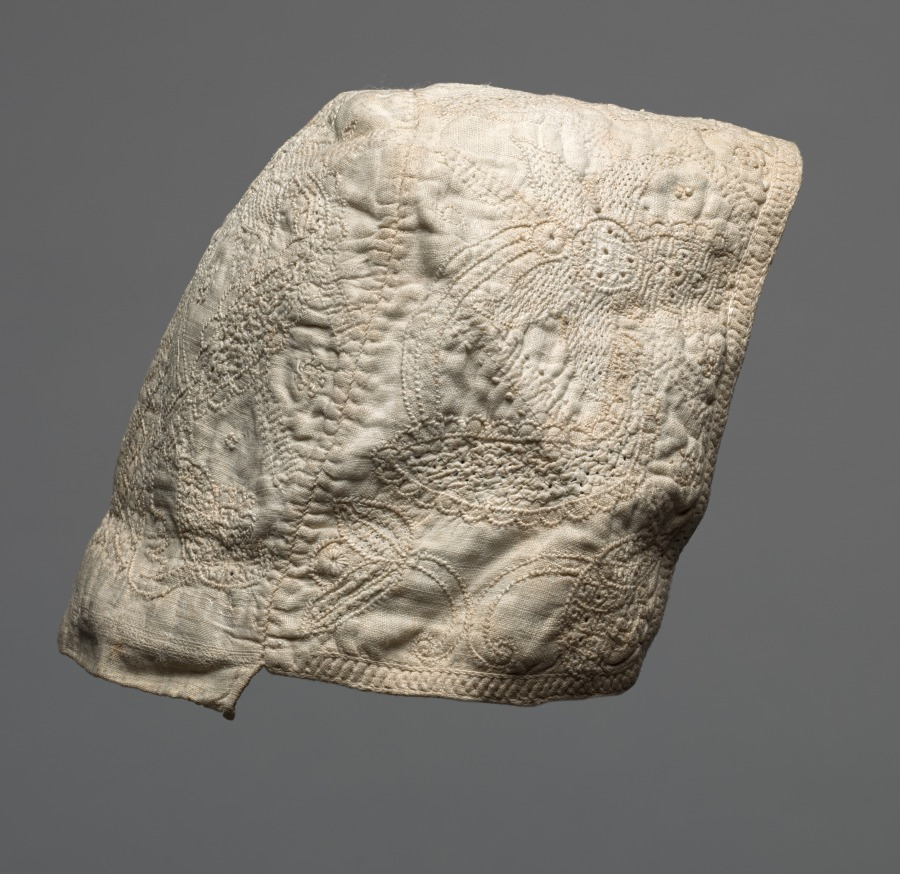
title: Cap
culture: Germany, Hesse, 19th century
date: 1800s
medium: Plain weave linen: needle lace (drawnwork) and embroidery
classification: Embroidery